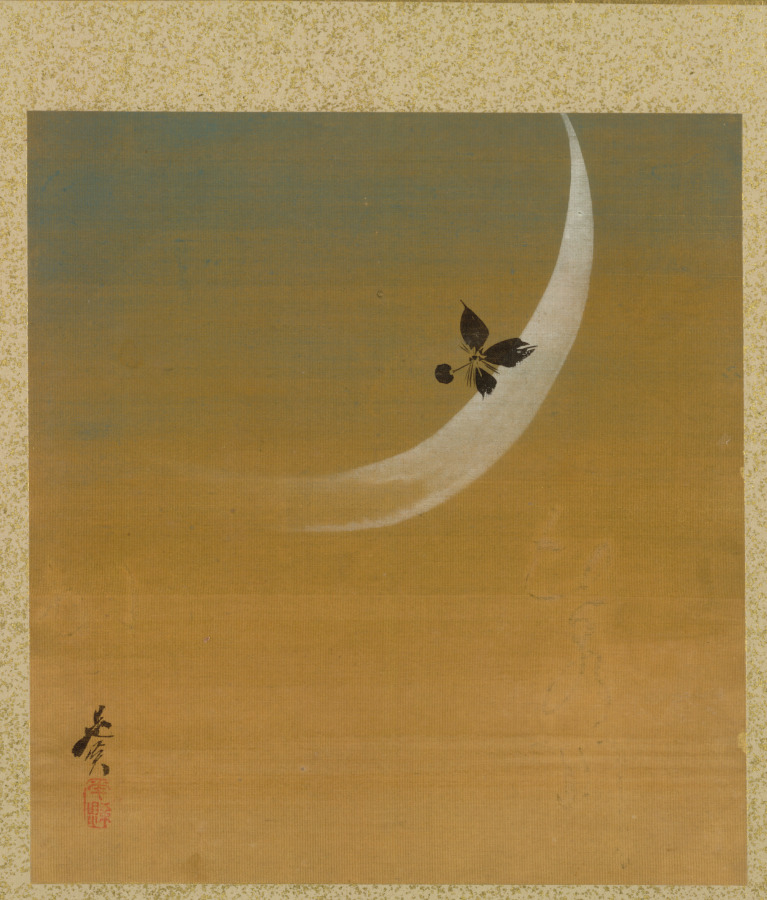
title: Crescent Moon from Album of Paintings by the Venerable Zeshin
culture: Japan, Edo period (1615–1868)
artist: Shibata Zeshin (Japanese, 1807–1891)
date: 1847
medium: leaf in accordion-style album; ink, color, and gold on silk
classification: Bound Volume